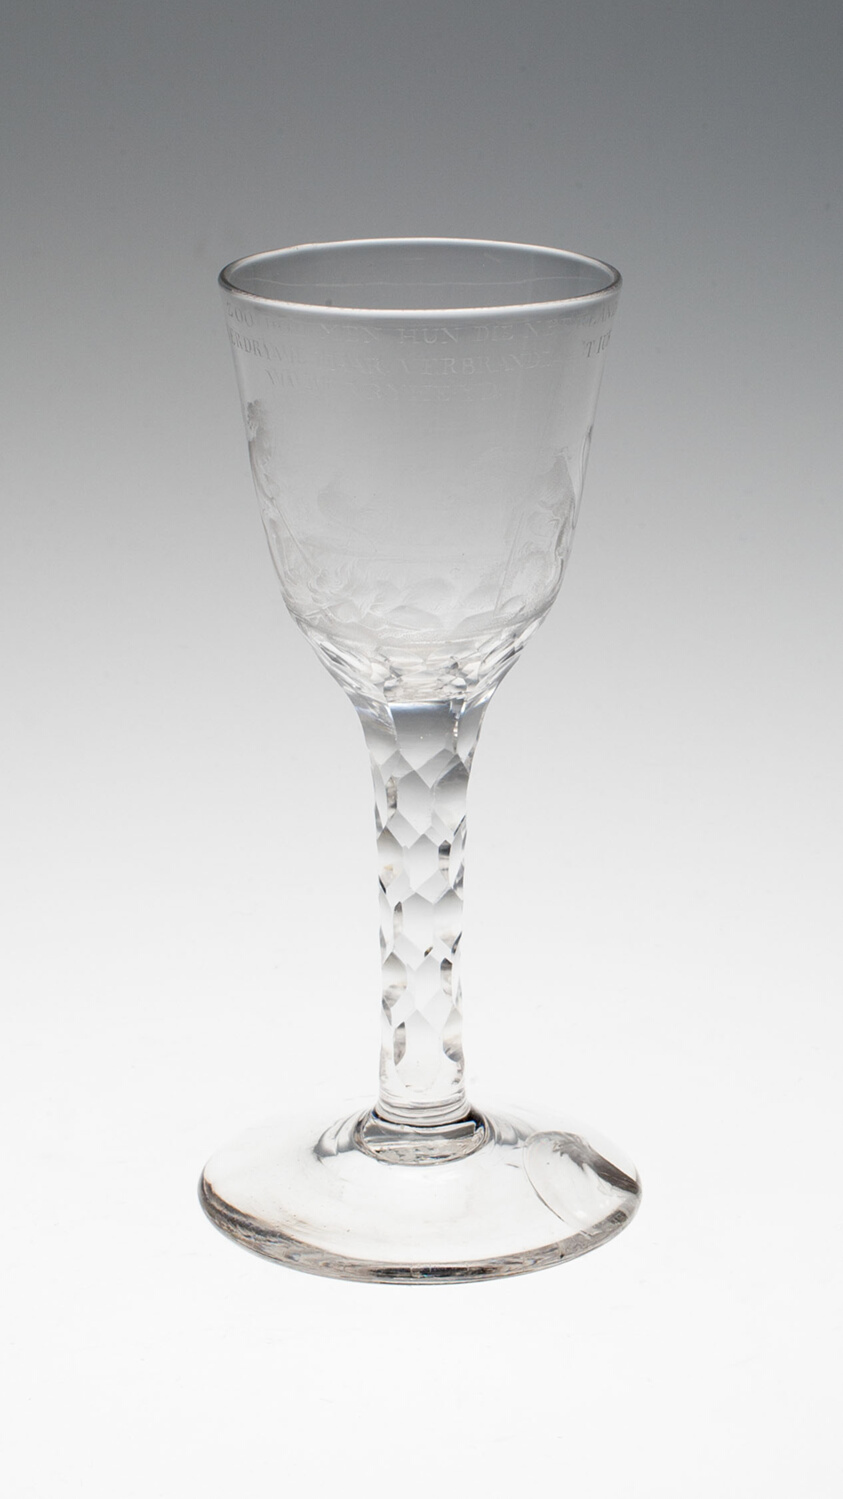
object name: Glass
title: Wine Glass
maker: England or Netherlands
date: c. 1795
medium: Glass; stipple engraved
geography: England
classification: drinking vessel; glass; european decorative arts